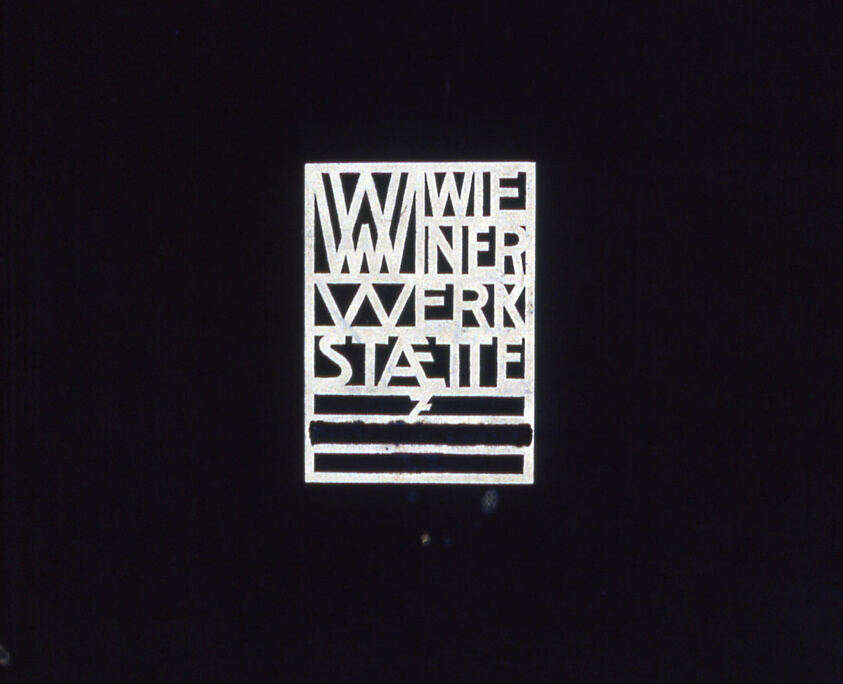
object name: Book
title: Sample Book Containing 125 Swatches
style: Modernism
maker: Produced by the Wiener Werkstätte (Vienna, active 1903–1932); Austria, Vienna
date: c. 1910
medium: Silk or wool, plain weave; screen printed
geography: Vienna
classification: textile; book; sample books